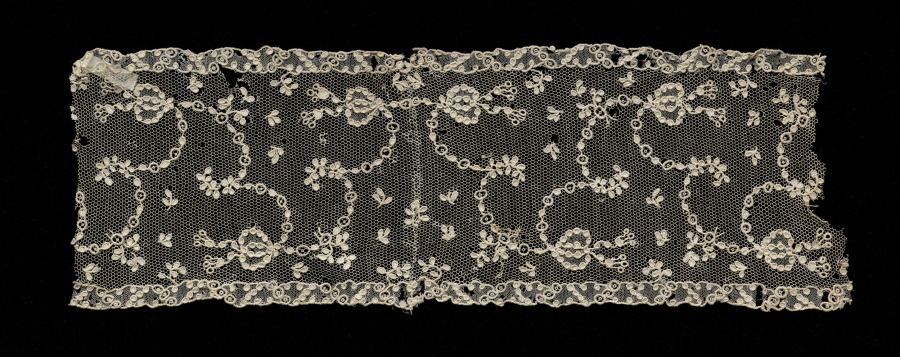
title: Lace Band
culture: France, Alençon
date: 1750–99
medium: Needle lace (Point d'Alençon)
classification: Lace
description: This lace band is done in a characteristic Louis XVIth style with its border of fine mesh.